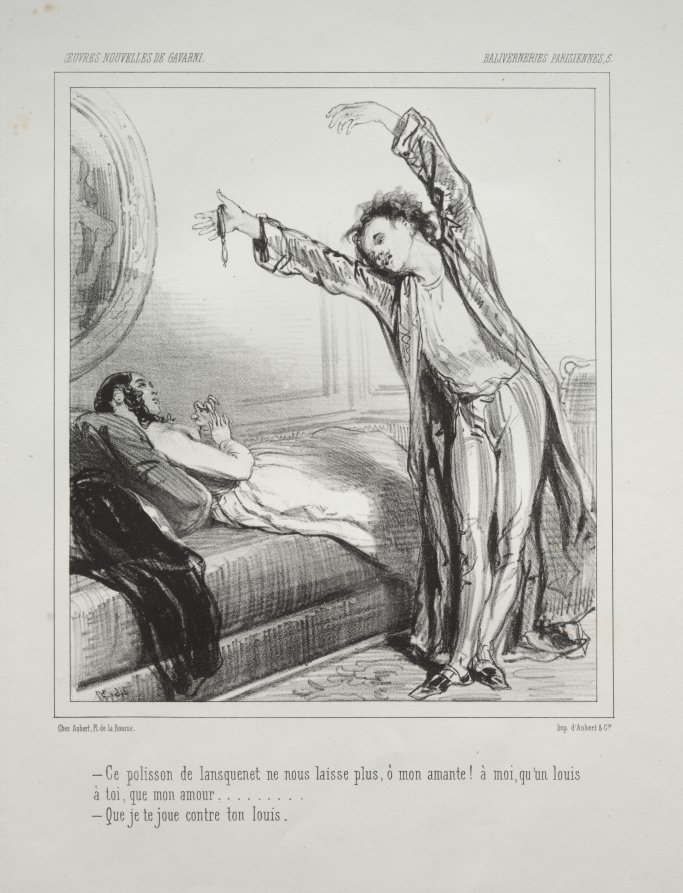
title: Baliverneries Parisiennes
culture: France, 19th century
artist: Paul Gavarni (French, 1804–1866)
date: c. 1847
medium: lithograph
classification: Print